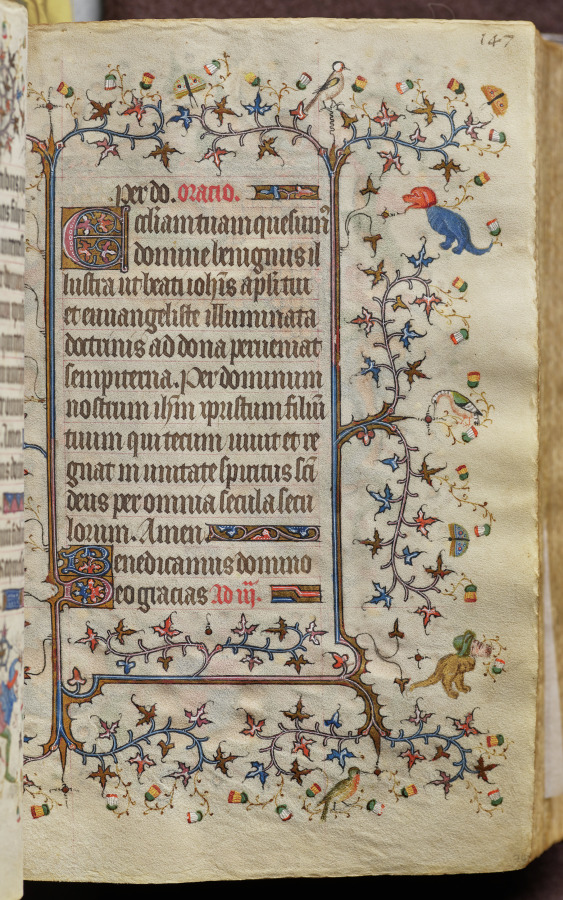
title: Hours of Charles the Noble, King of Navarre (1361-1425): fol. 74r, Text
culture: France, Paris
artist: Master of the Brussels Initials and Associates (French)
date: c. 1405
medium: ink, tempera, and gold on vellum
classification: Bound Volume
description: This precious volume was obviously highly prized by its owner, the French-born King of Navarre, who had his coat of arms painted on no less than twenty folios. Rather than directly commissioning this manuscript from a specific workshop, it seems that Charles the Noble acquired his book of hours -- perhaps ready-made for the luxury market -- while on a trip to Paris in 1404-05. A collaborative effort, six painting styles are evidenced within the pages of this codex, those of two Italians, two Frenchmen, and two Netherlanders. The painter who was responsible for the planning and decoration of the book, and who produced seventeen of the large miniatures, was a Bolognese artist known as the Master of the Brussels Initials. His principal assistant, responsible for most of the borders, was a Florentine who signed his name "Zecho" da Firenze on folio 208 verso.